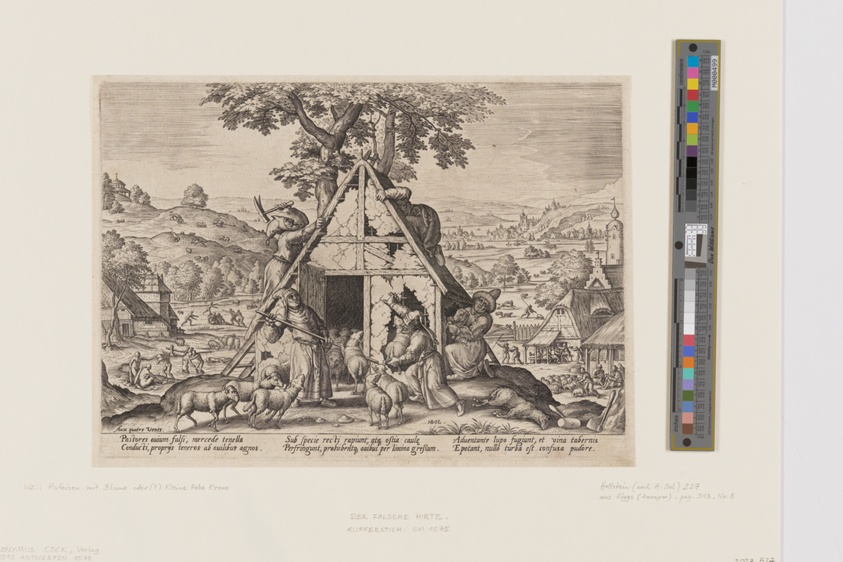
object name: Print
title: The False Shepherd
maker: Jan Sadeler I (Flemish, 1550–1600); after Hans Bol (Flemish, 1534–1593)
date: c. 1575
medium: Engraving on ivory laid paper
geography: Flanders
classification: engraving; paper; print; prints and drawing